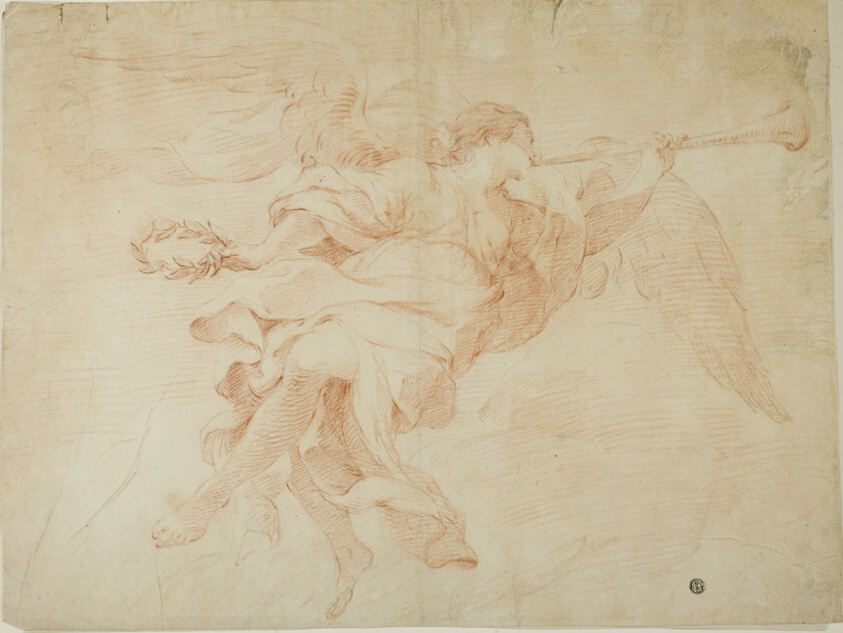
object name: Drawing and Watercolor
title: Angel with Trumpet and Wreath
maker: Unknown Artist; Italian, 18th century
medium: Red chalk, over traces of black chalk, on cream laid paper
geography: Italy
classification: chalk; drawings (visual works); prints and drawing